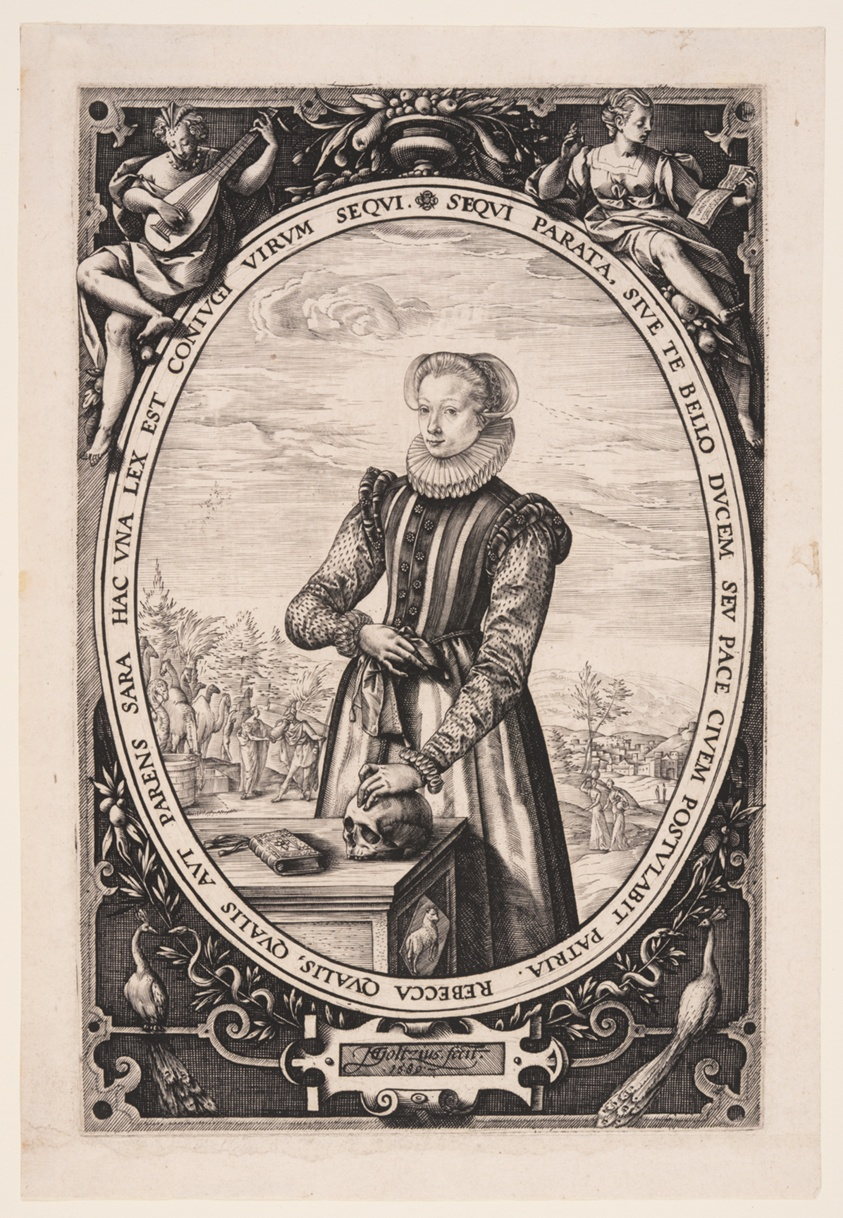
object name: Print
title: Josina Hamels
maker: Hendrick Goltzius (Dutch, 1558–1617)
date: 1580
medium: Engraving on laid paper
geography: Netherlands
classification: engraving; paper; print; prints and drawing